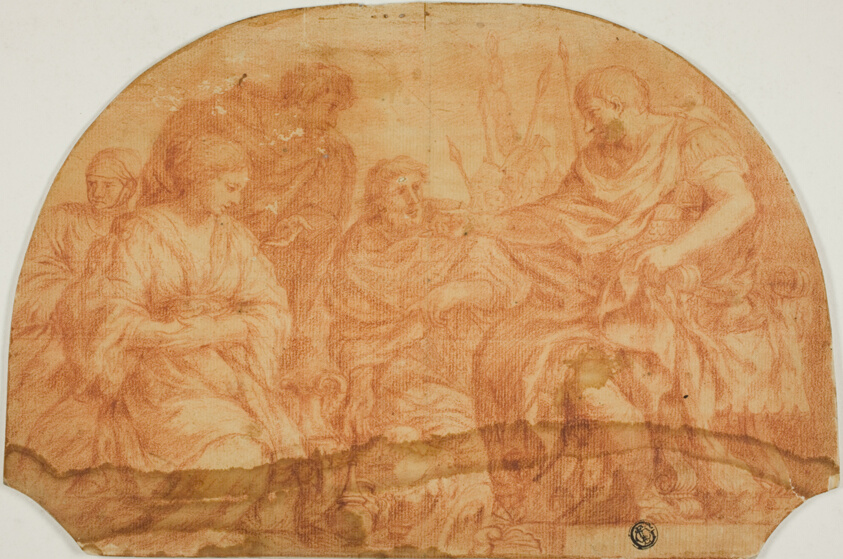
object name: Drawing and Watercolor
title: Continence of Scipio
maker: after Pietro da Cortona; Italian, 1596-1669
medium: Red chalk, on tan laid paper, lunette laid down on ivory wove paper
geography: Italy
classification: chalk; drawings (visual works); prints and drawing